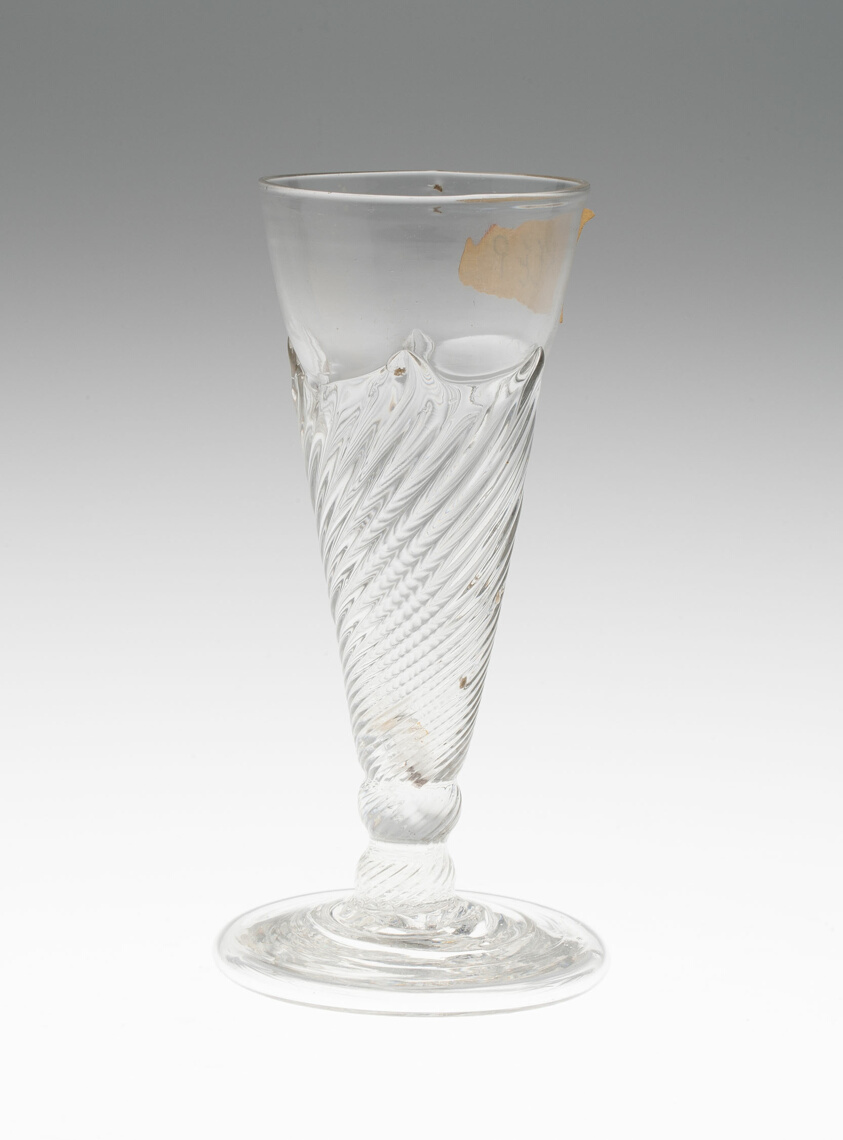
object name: Glass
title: Ale Glass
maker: England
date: c. 1685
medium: Glass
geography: England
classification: drinking vessel; glass; european decorative arts